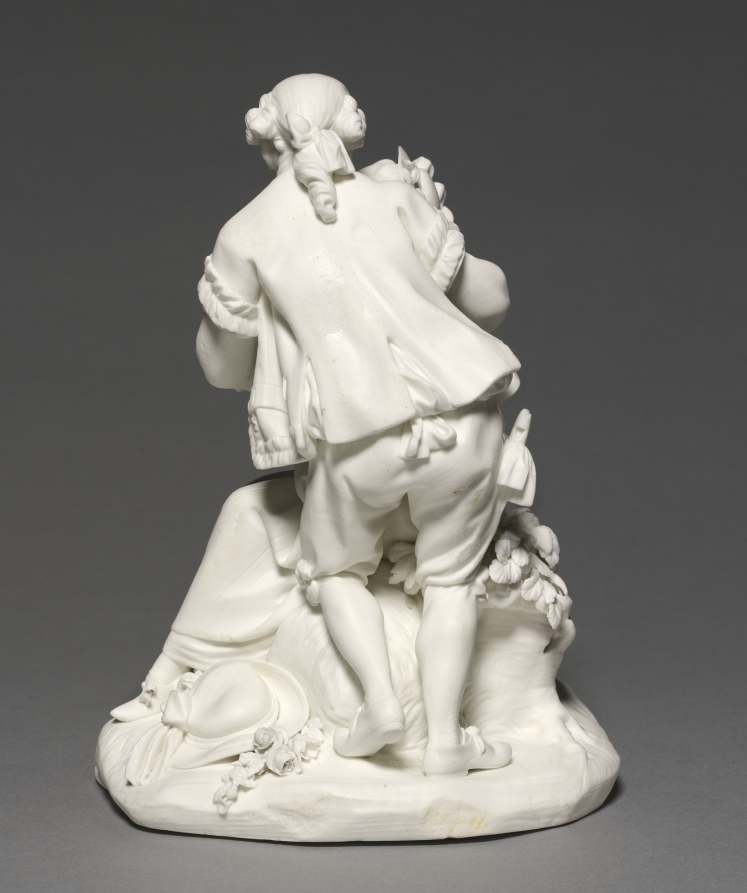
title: Figure Group of the Festival at the Chateau (La fête au château) or the Model Fidelity (La fidélité modèle)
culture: France, Sèvres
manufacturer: Sèvres Porcelain Factory (French, est. 1756)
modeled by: Etienne-Maurice Falconet (French, 1716–1791)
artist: after a design by François Boucher (French, 1703–1770)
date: 1766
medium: unglazed soft-paste porcelain (biscuit)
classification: Ceramic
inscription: 'B' incised on top of base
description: Recognizable porcelain figures and figure groups modeled after contemporary theatrical works produced by the Parisian company Opéra-Comique were produced at the Vincennes factory as early as 1752. This group illustrates a scene from a play credited to Charles-Siméon Favart, Fête au Château (Festival at the Castle), when the gardener Jacquot and his love Colette reunite.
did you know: The introduction of Sèvres porcelain figures modeled after the Opéra-Comique’s theatrical productions may have resulted from the friendship between François Boucher, designer of many early Sèvres porcelain figures, and Charles-Siméon Favart, director of the theater in 1758.